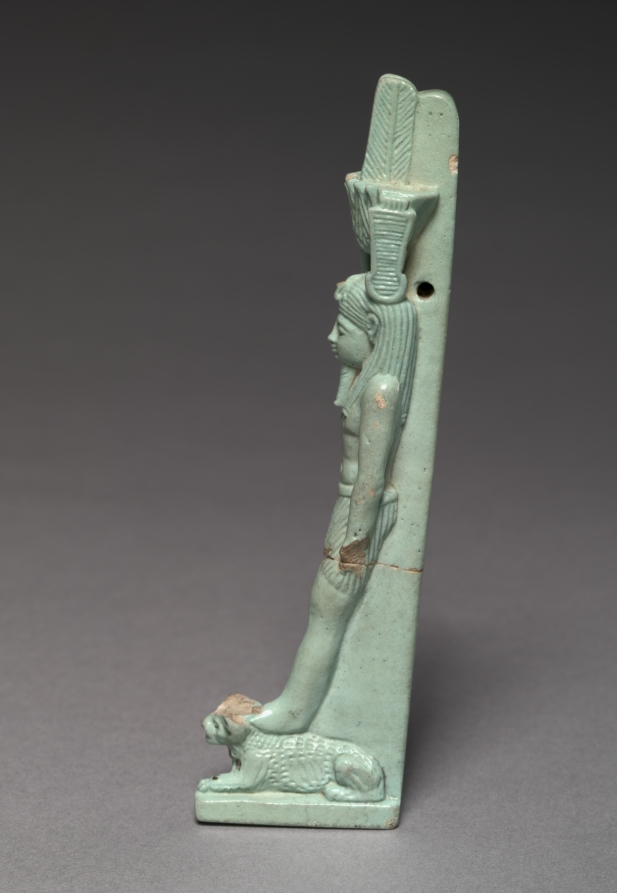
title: Amulet of Nefertem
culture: Egypt, Late period (715–332 BCE), Dynasties 27–30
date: 525–343 BCE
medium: faience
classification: Amulets